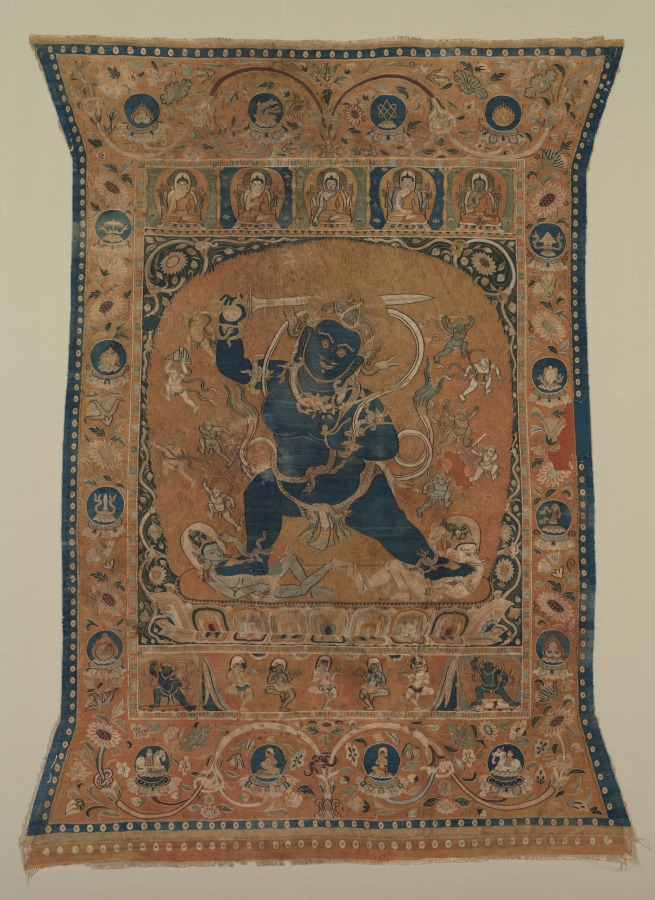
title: Achala, King of the Wrathful Ones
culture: China, Zhejiang Province, probably Hangzhou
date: early 1200s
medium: Thangka, silk tapestry with pearls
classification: Textile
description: The powerful blue body of Achala, meaning “immovable,” dominates the composition. He holds a sword to cut through ignorance and a noose for catching illusions that plague the path to enlightenment. Small personifications of furious destroyers of illusion (maya) emanate from him on either side, each with his own weapon. This image expresses what advanced practitioners would visualize in meditation rituals, as explained in Buddhist texts called tantras. Woven with a sophistication matched only by products of the Hangzhou looms, this devotional tapestry made its way to Khara-Khoto, capital of the Tangut Empire located in present-day Mongolia and Central Asia, where tantric Buddhism was prevalent.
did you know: The elephant-headed figure under his left foot is a demonic divinity, a yaksha, who creates obstacles to enlightenment.